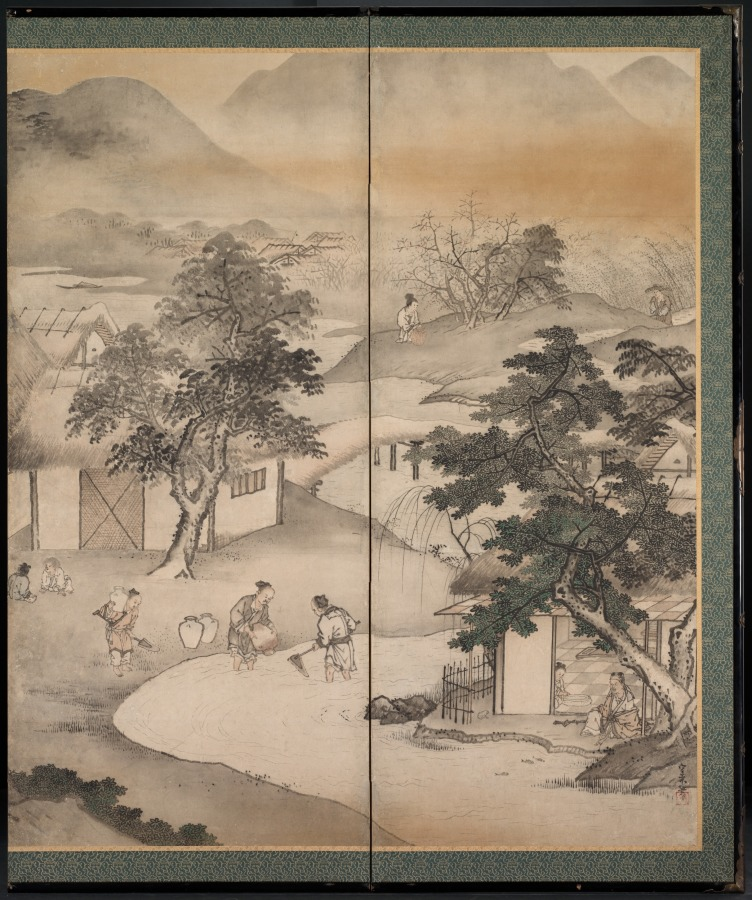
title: Emperor Yao Visiting Yu Chonghua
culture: Japan, Edo period (1615–1868)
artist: Kusumi Morikage (Japanese, active c. 1620–1690)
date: mid- to late 1600s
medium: One of a pair of six-panel folding screens, ink, slight color, and gold on paper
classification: Painting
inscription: signature and seal at lower right.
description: One of a pair, this screen shows a section of the narrative of how the Chinese Emperor Yao (about 2356–2255 BC) selected his successor, Yu Chonghua (about 2294– 2184 BC), who would become Emperor Shun. The artist who painted this screen, Kusumi Morikage, trained with Kano Tan’yō (1602–1647), painter-in-residence to Japan’s shogun, the country’s ruler, and was one of his four top students. Despite the conservative subject matter, Morikage’s distinctive sensibility shines through in his playful treatment of the gray and white elephants in the far left panel of the composition. According to legend, Chonghua was so virtuous that in the spring, elephants bounded down from the mountains to help him till the soil with their tusks.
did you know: The emperor's two-wheeled carriage sits in front of a thatched-roof farmhouse.